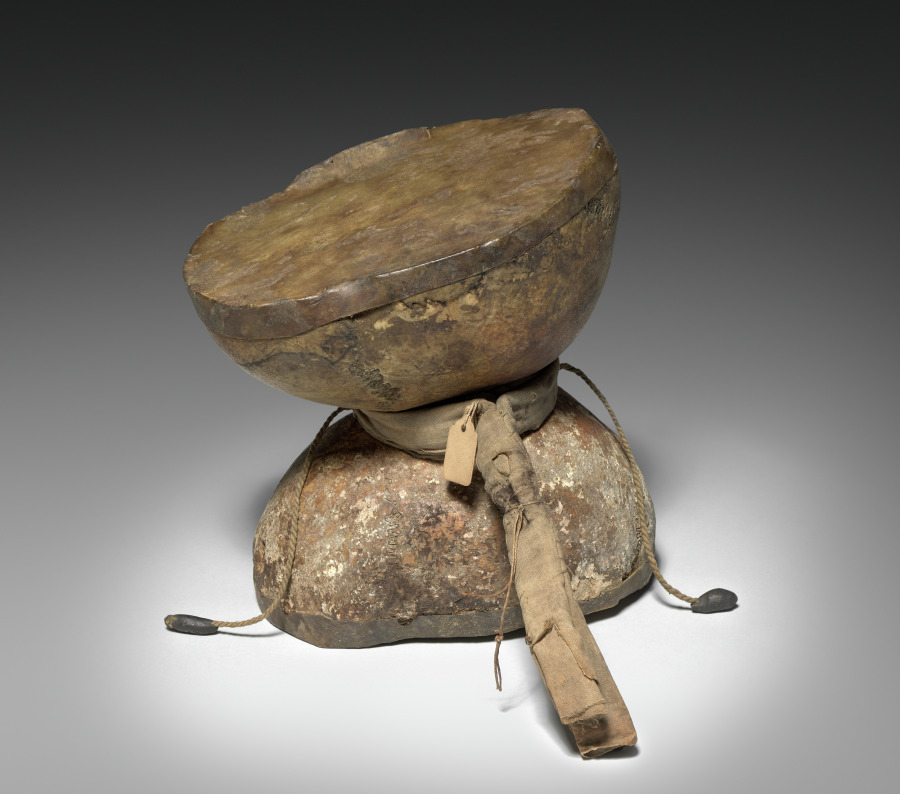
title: Ritual Drum (damaru)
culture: Tibet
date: c. 1800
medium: skull bone, cloth, hemp fiber, leather, and skin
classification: Musical Instrument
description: Damaru drums are made from the tops of two skulls joined in the center and sounded by rapidly turning it side to side so the ends of the cords fly up to sound against the stretched skin. In Hindu and Buddhist rituals, the rhythm of the damaru references the ongoing, relentless beat of time. The material of bone reminds practitioners of the inevitability of death in the course of time.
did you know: Dancing Shiva, in his form as Nataraja, holds a damaru in one hand.